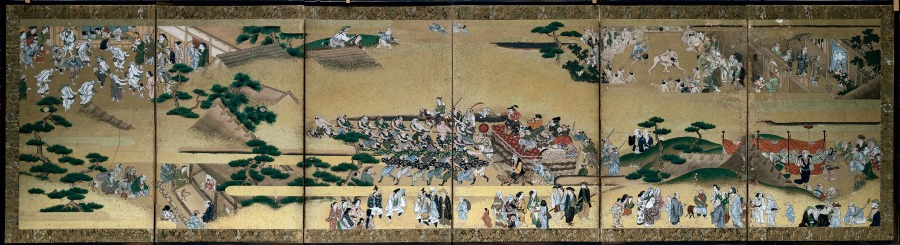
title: Festival Scenes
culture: Japan, Edo period (1615–1868)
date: 1615–99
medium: pair of six-panel folding screens; ink, color, gold, and gold leaf on paper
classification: Painting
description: Much smaller in size than standard Japanese folding screens, this lively pair depicts all manner of entertainments. Although at first they seem to show an ongoing festival, closer examination reveals that the screens comprise a series of isolated scenes from disparate occasions. In one screen, crowds gather around a bout of sumo wrestling as well as juggling and balancing acts. Elsewhere, teams of men pull a float bearing musicians costumed in foreign dress. There is also a dance circle with drums, a performing monkey, and a party of falconers. In the other screen, male courtiers observe a game of kickball played by noblemen, while their female counterparts watch from behind bamboo curtains. Others enjoy a theater performance. A children’s dance circle and a dance performance with ladies sporting elaborate headgear occupy the center of the screen. A group wielding huge parasols at the upper left of the screen reenacts episodes from legend, as still other performances, including dancing dogs, entertain the crowds below.